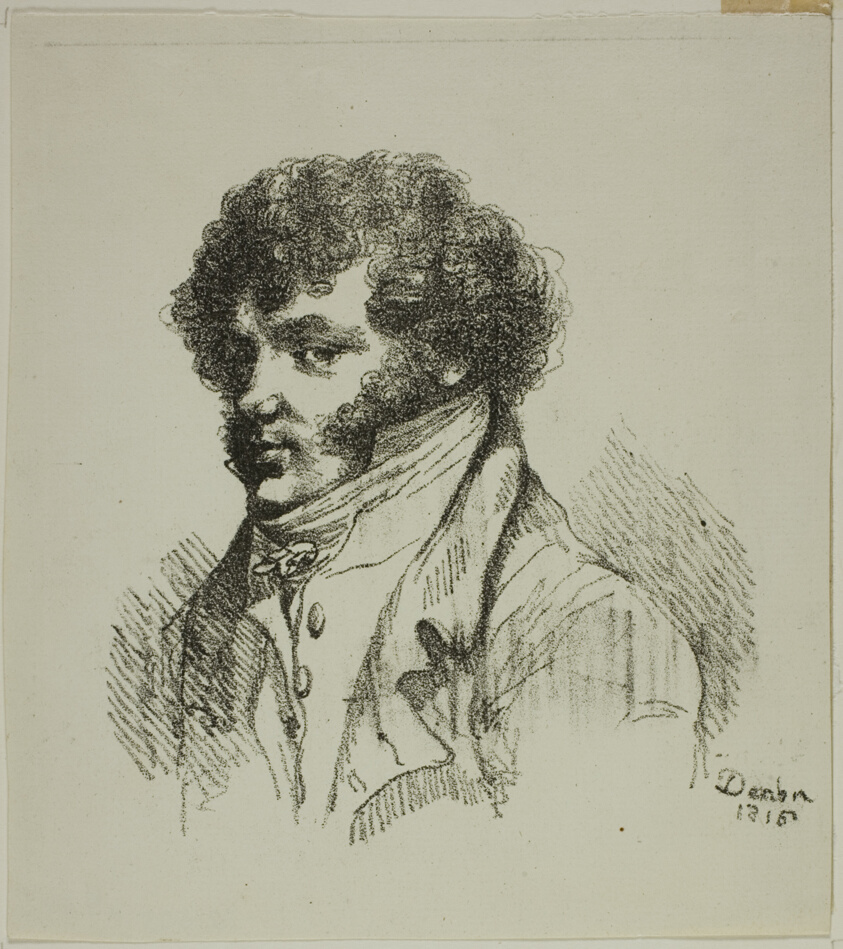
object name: Print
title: Portrait of Brunet, Printer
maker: Dominique-Vivant Denon (French, 1747-1825)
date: 1816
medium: Lithograph in black on ivory laid paper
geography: France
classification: lithograph; print; prints and drawing